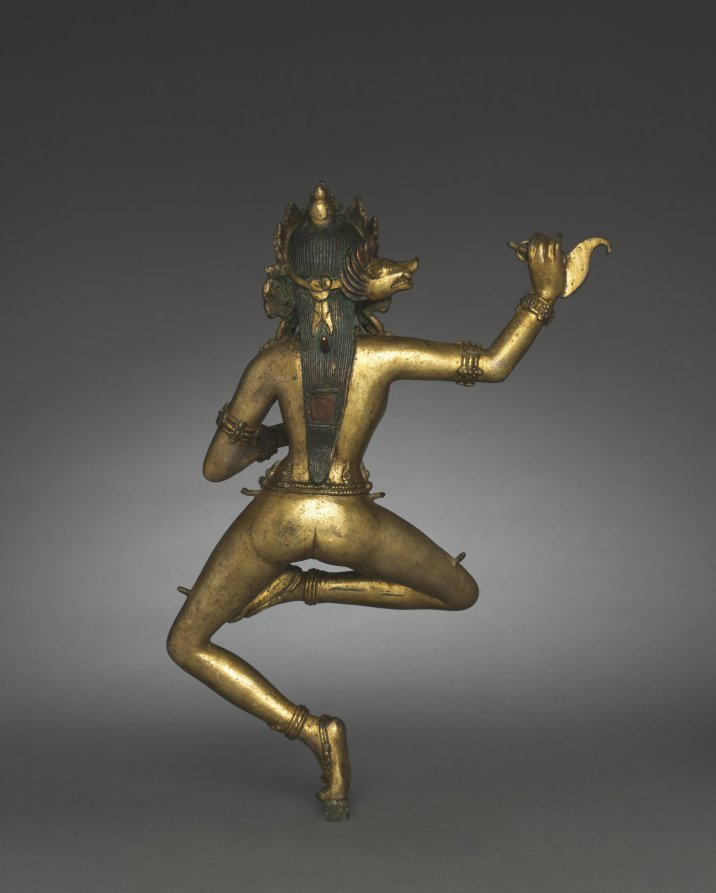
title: Vajravarahi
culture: Tibet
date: 1300s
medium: gilt bronze with turquoise inlay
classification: Sculpture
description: Vajravarahi is the tantric Buddhist counterpart to the Hindu mother goddess Varahi, identifiable by the boar head emerging above her right ear. She is a female enlightened being who emanated from the Buddhist Goddess of Perfect Wisdom. Enlightened beings transcend gender distinctions, and they can emanate as either male or female. The lithe figure dances while carrying a skull cup in her left hand. Raised up in her right hand is a ritual flaying knife with a handle in the shape of a halfvajra, used for skinning the metaphorical beast of uncontrolled passions. The pegs cast into her lower body were for holding a bone skirt.